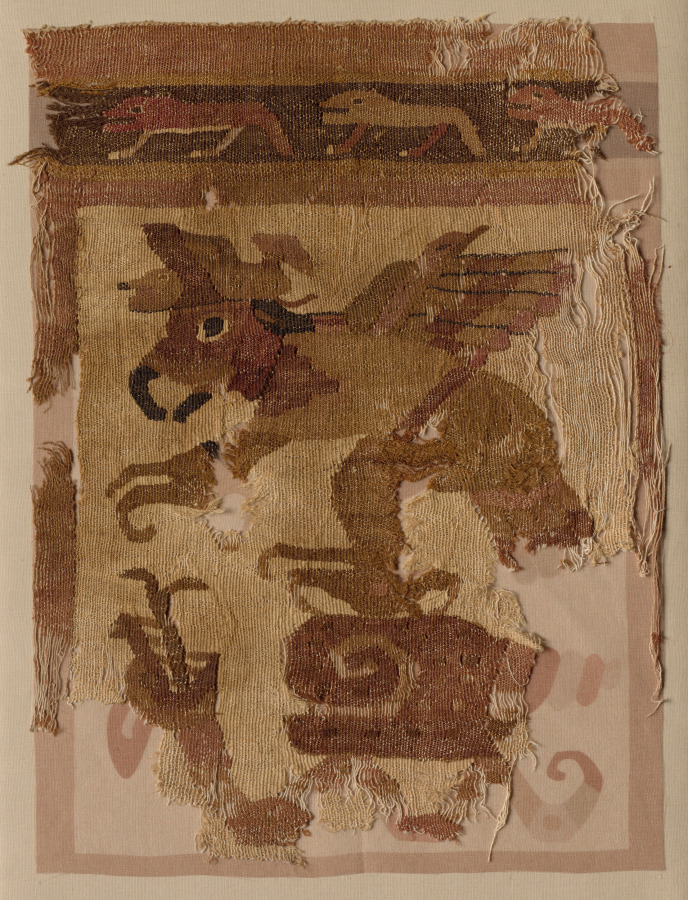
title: Textile Fragment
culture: Peru, Moche, north coast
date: c. 50–650 CE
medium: cotton and camelid fiber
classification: Textile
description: This fragment, one of several in the collection, is a rare survivor of catastrophic rains that destroyed much of the Moche textile legacy and may have helped to bring about the decline of Moche culture. It depicts a serpent and a snail beneath a hovering raptorial bird—perhaps a snail kite, a type of hawk named after its favored food. The size of the motifs implies that the original textile was large; a mantle (a shawl-like garment) or a hanging are among the possibilities.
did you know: This fragment is a rare survivor of floods that destroyed much of the Moche textile record.